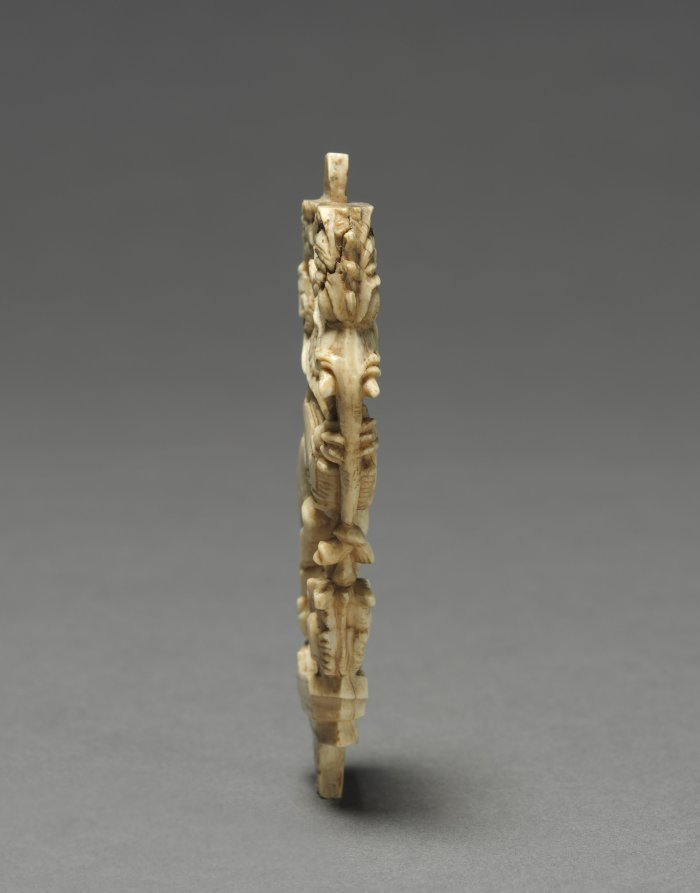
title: Carved Bracket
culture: South India, probably Madurai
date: 1600s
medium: Ivory with traces of pigment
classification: Ivory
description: Composite creatures with the body of a lion, tusks and trunk of an elephant, and horns of an antelope are standard elements of medieval Indian architecture and furniture. Traces of pigment indicate that these ivory furniture facings were brightly painted.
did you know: These creatures stand for shakti, or creative energy.